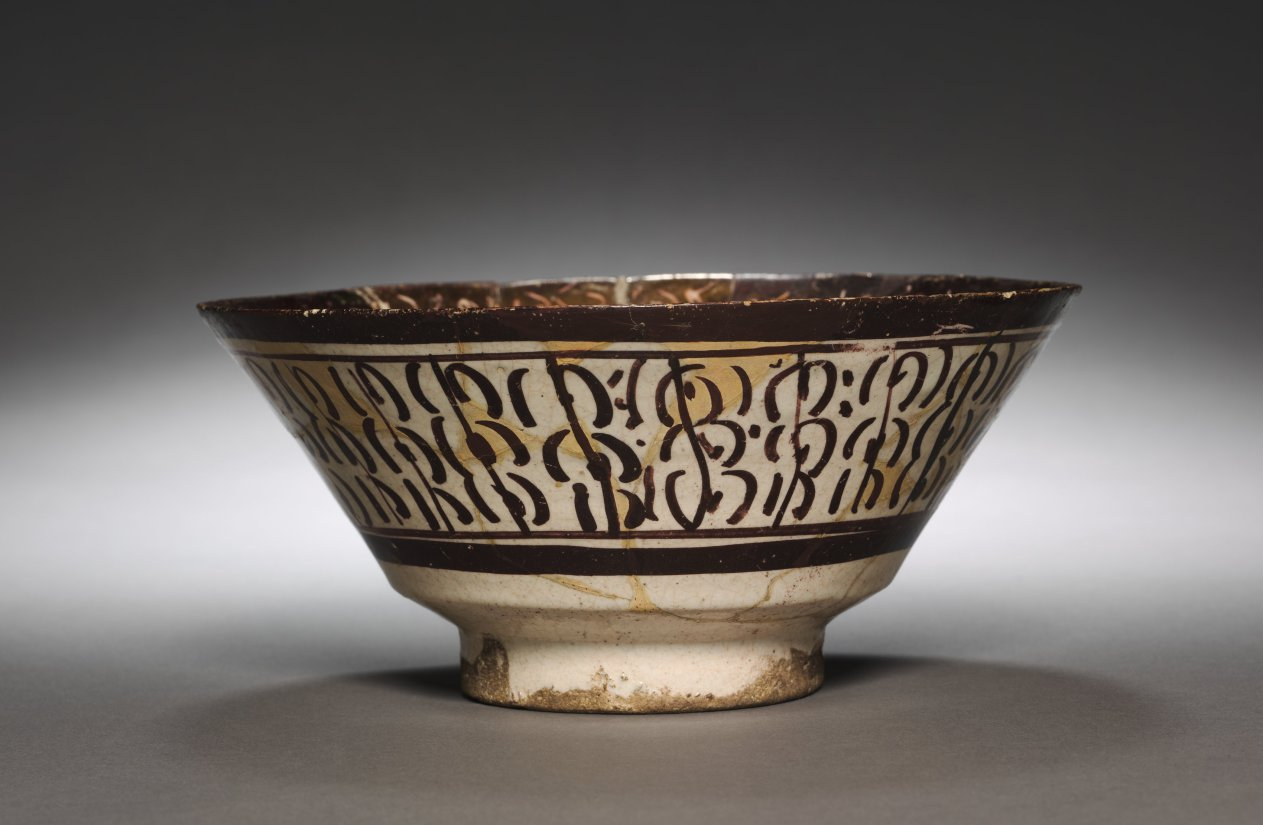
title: Bowl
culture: Iran, Kashan, Seljuq period of Iran (1037–1194)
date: early 1200s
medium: fritware with luster-painted design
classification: Ceramic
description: Fritware Where fine clay was unavailable, potters made a paste out of ground quartz, clay, and glass. When fired, the paste created a compact white material called fritware that approximated the appearance of porcelain.